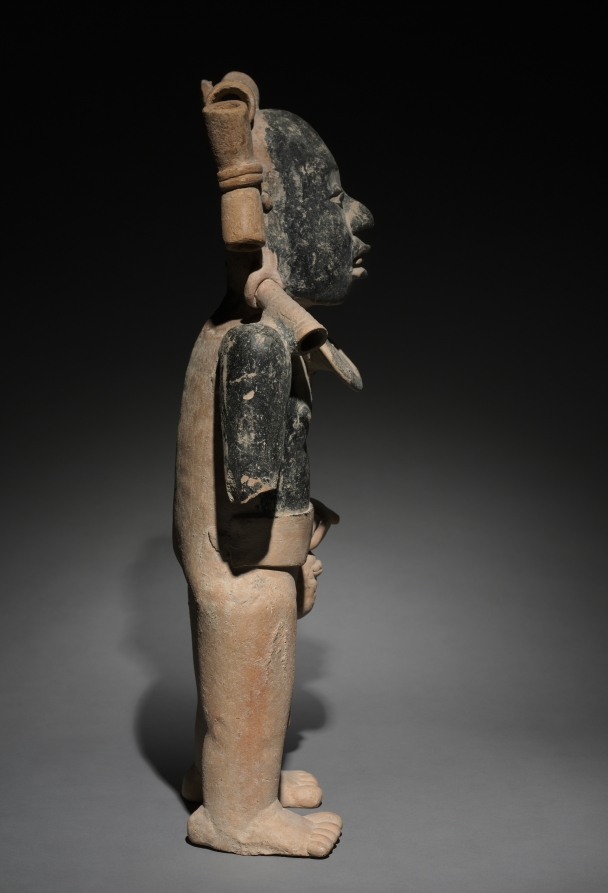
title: Standing Male Figure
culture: Mexico, Gulf Coast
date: 300–900 CE (thermoluminescence date, 240–945 CE)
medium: earthenware, asphalt and resin paint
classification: Sculpture